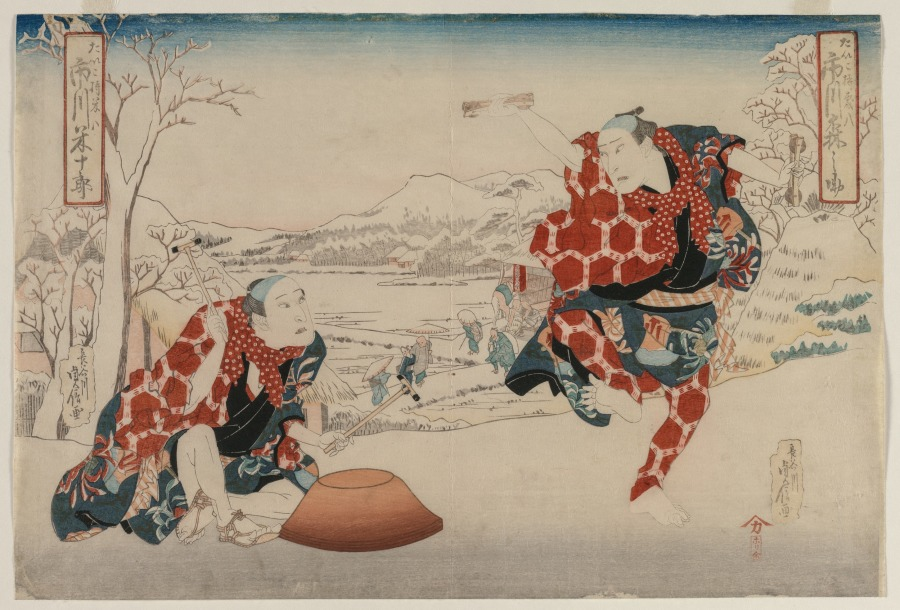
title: Ichikawa Norinosuke and Ichikawa Yonejuro as Morihachi and Yonehachi, Two Comedians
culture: Japan, Edo period (1615–1868)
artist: Hasegawa Sadanobu (Japanese, 1809–1879)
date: late 1830s or early 1840s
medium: color woodblock print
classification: Print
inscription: Signature: Hasagawa Sadanobu ga Engraver: Hori Kin (end emblem)